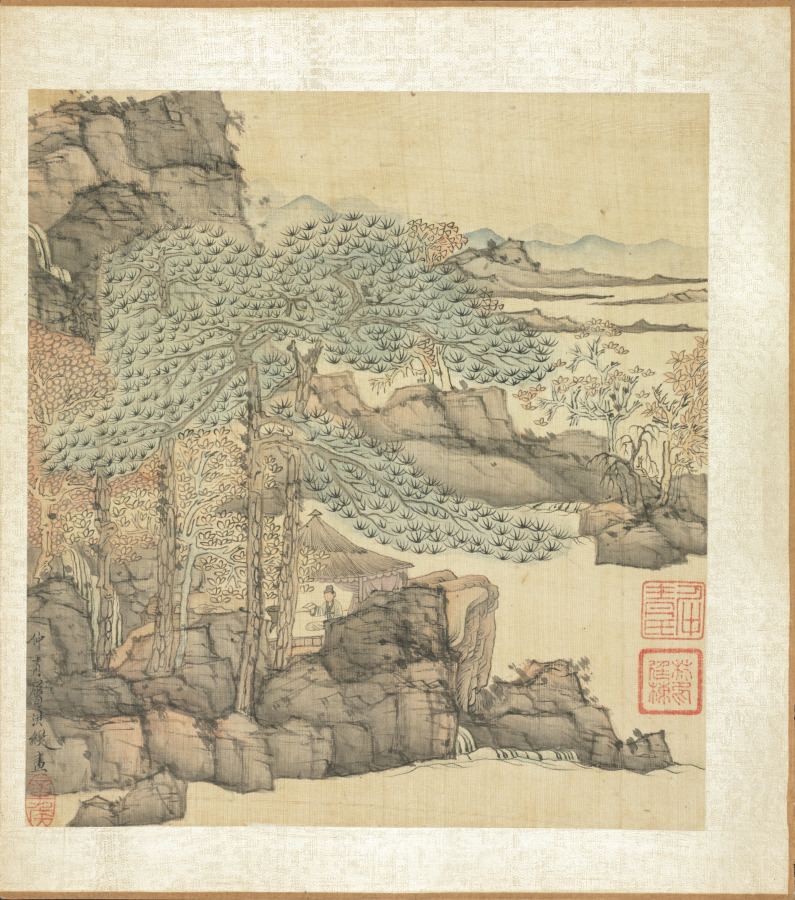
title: Paintings after Ancient Masters: Scholar Reading in a Thatched Hut by a Waterfall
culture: China, Ming dynasty (1368–1644)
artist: Chen Hongshou (Chinese, 1598/99–1652)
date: 1598–1652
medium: album leaf; ink and color on silk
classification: Painting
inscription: Zhongqing entrusted Hongshou to paint. [seal] Zhanghou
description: The twenty paintings in this double-album by Chen Hongshou include landscapes, figures, and flowers. It also has one leaf featuring a woman, an often-used subject not found in the other albums from the latter part of his career. His late works are wonderful summations of Chen's peculiar and quirky art--archaistic, hyper-refined--but without accompanying shallowness or sentimentality. His figures and landscapes in the late albums are miniaturized, not unlike the small Chinese gardens, or the carefully selected small table rocks or old roots used for contemplation to see the world in miniature. This loss of scale is quite deliberate and reflects the psychological situation of a depressed class like the Ming loyalist officials and scholars, deprived of their integrity and honor, and forced to lead a diminished and restricted existence.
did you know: Chen Hongshou dedicated this album of 20 paintings to his friend Lin Zhongqing.